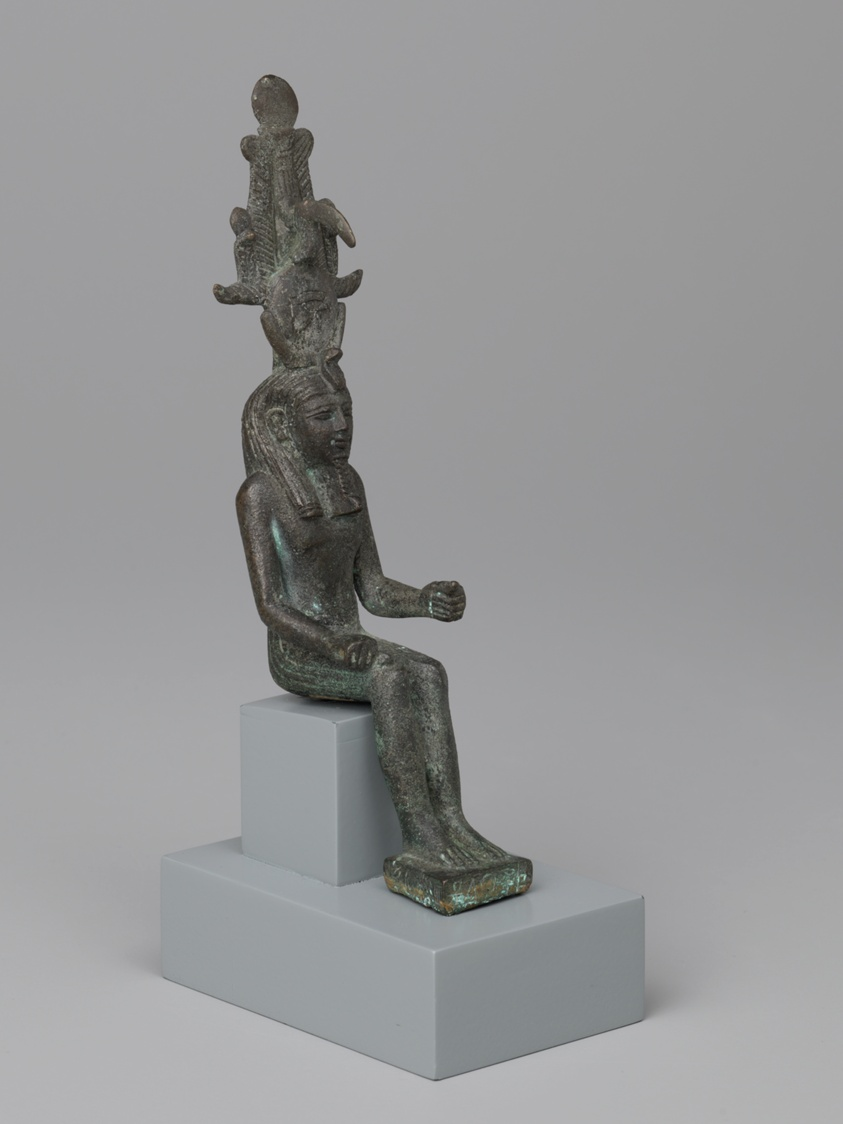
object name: Sculpture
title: Statuette of Osiris-Iah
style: late period (egyptian), ancient, egyptian, thirtieth dynasty, twenty-eighth dynasty, twenty-ninth dynasty, twenty-seventh dynasty, twenty-sixth dynasty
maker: Egyptian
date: Late Period, Dynasty 26–30, about 664–332 BCE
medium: Copper alloy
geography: Egypt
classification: statuette; bronze; metal; sculpture; ancient art; votive offering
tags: gods (deities), goddesses, crowns